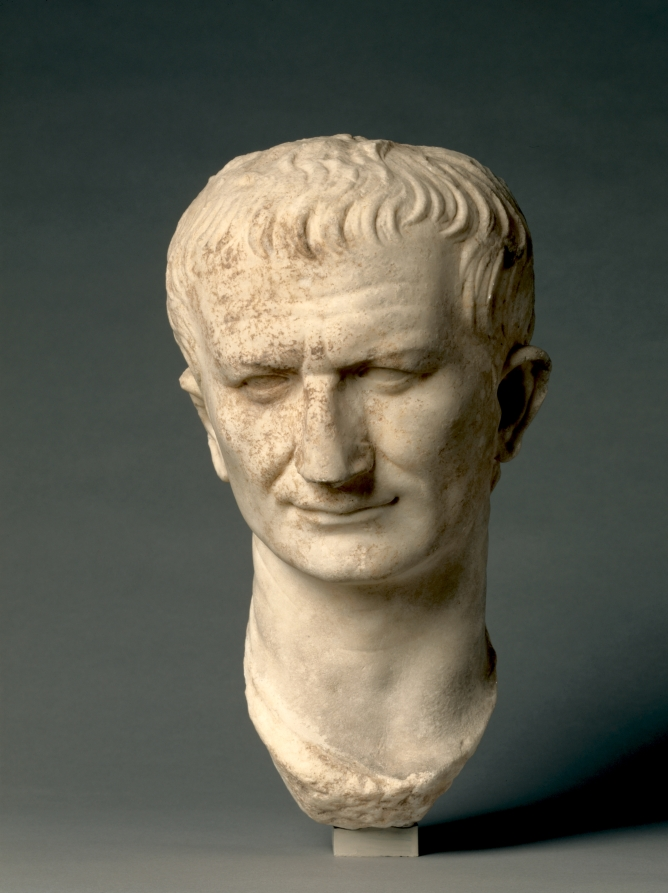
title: Portrait Head of Emperor Vespasian, Recut from Head of Nero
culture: Italy, Roman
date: 64–79 CE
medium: marble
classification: Sculpture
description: Although this portrait head was designed to fit into a statue of a body, it did not originally belong with the togate body that held it when purchased by the museum in 1929. In 1973, the two were separated, and the body is now in storage. The head itself was recarved in antiquity, from a likeness of Nero to one of Vespasian, following the damnatio memoriae (condemnation of memory) of the former. A line at the back of head shows clearly where the long hair of Nero has been shortened, while other Neronian features, such as a receding lower lip, remain.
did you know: Originally a portrait of Emperor Nero, this head was recarved after his damnatio memoriae (condemnation of memory).